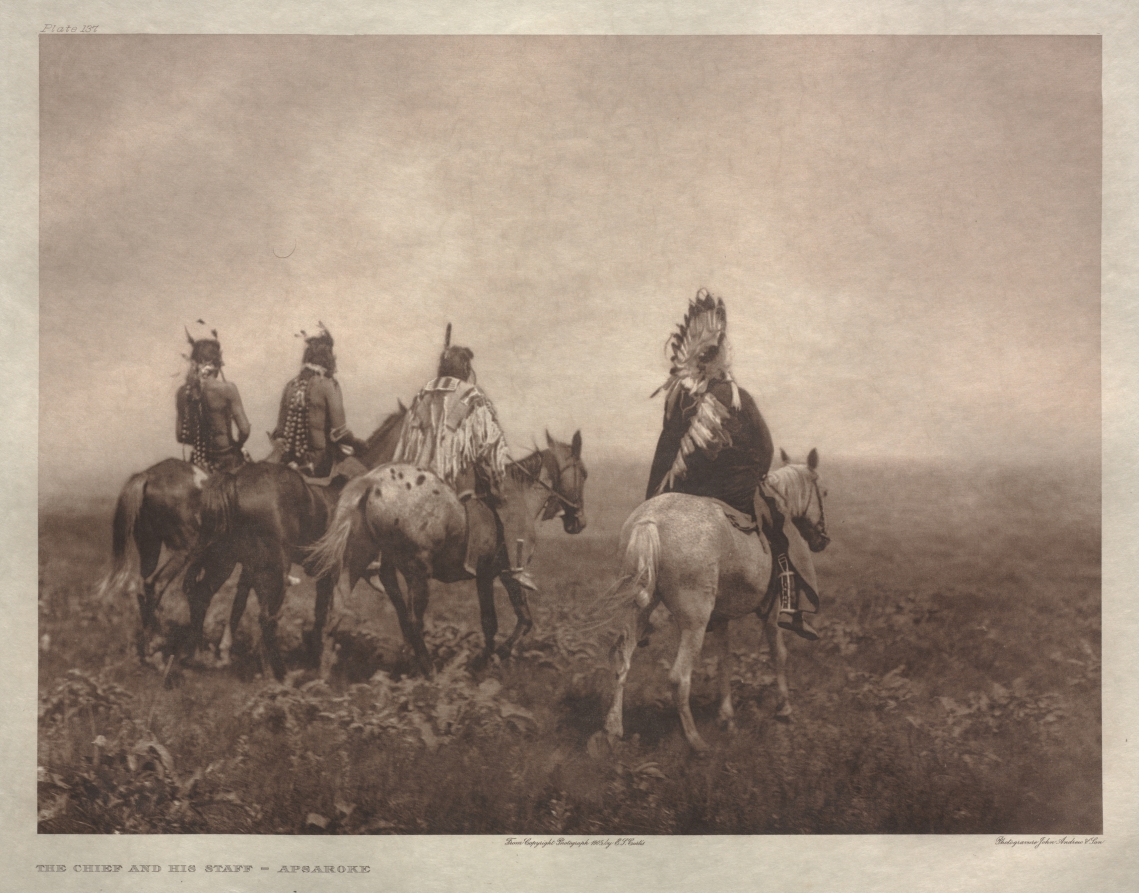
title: Portfolio IV, Plate 137: The Chief and His Staff--Apsaroke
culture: America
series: The North American Indian: being a series of Portfolios picturing and describing the Indians of the United States, the Dominion of Canada, and Alaska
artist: Edward S. Curtis (American, 1868–1952)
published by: The University Press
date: 1905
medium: photogravure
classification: Portfolio